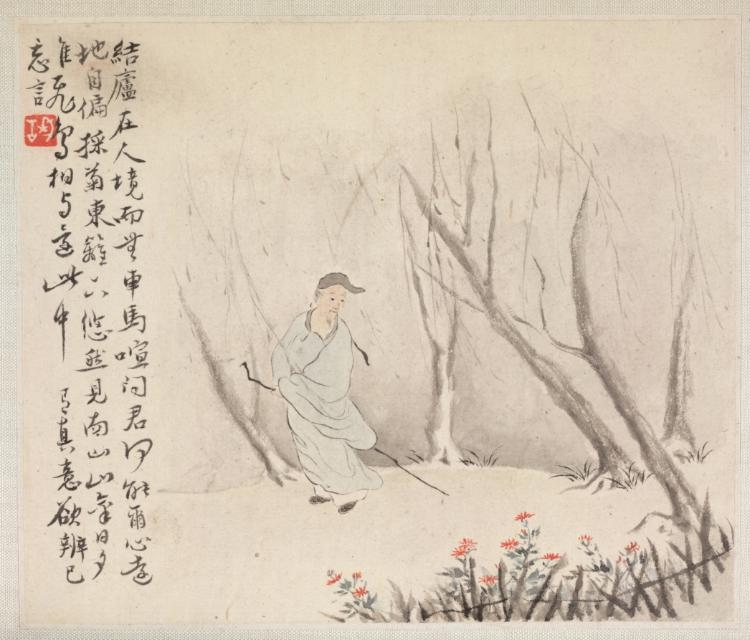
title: Album of Landscape Paintings Illustrating Old Poems: Man with a Staff Admires Chrysanthemums at a Fence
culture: China, Qing dynasty (1644-1911)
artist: Hua Yan (Chinese, 1682–c. 1765)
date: 1745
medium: Album leaf; ink and light color on paper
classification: Painting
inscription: Calligraphy to left of figure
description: Hua Yan’s painting of a gentleman admiring orange chrysanthemums evokes a quote from the poem Drinking Wine by poet and recluse Tao Qian (also called Tao Yuanming, AD 365–427): "I pluck chrysanthemums under the eastern fence, and serenely I gaze at the southern mountains."